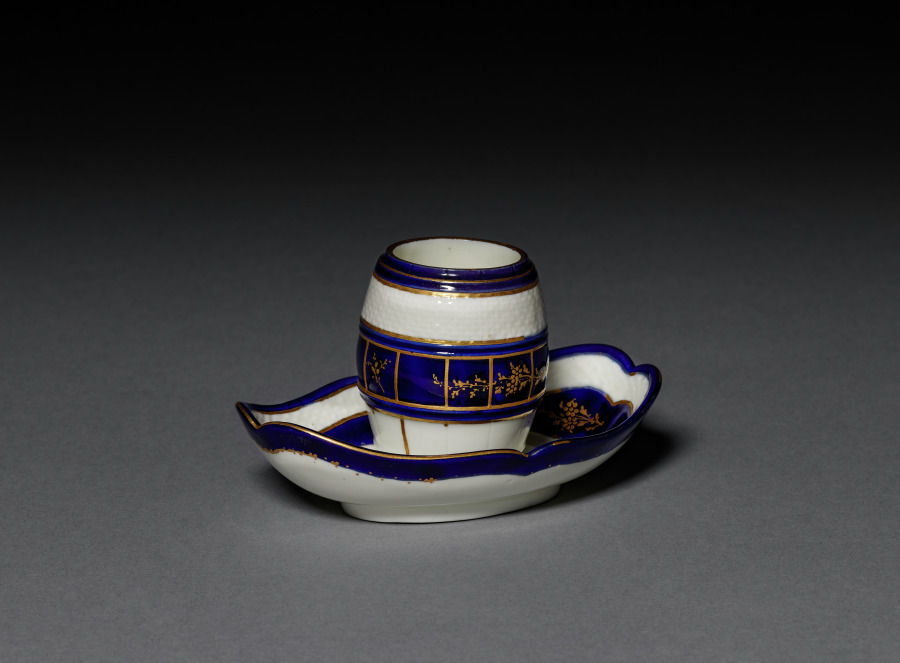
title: Mustard Pot with Stand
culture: France, Chantilly, 18th century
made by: Chantilly Porcelain Factory (French)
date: c. 1775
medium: soft-paste porcelain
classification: Ceramic